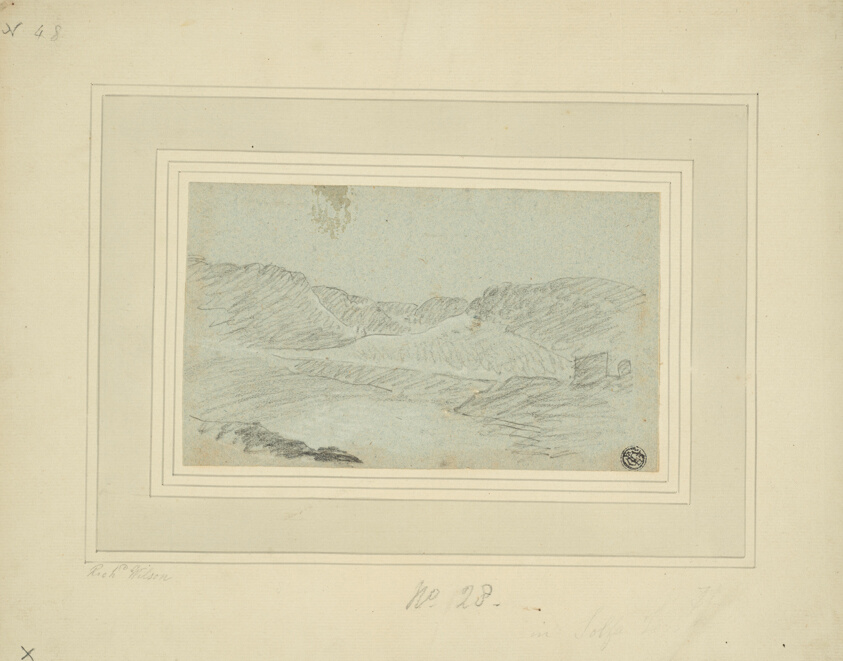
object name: Drawing and Watercolor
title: Hilly Landscape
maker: Attributed to Richard Wilson; English, 1714-1782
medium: Charcoal on blue laid paper, laid down on cream laid paper, laid down on cream laid paper (2 layers)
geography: England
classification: charcoal; drawings (visual works); prints and drawing